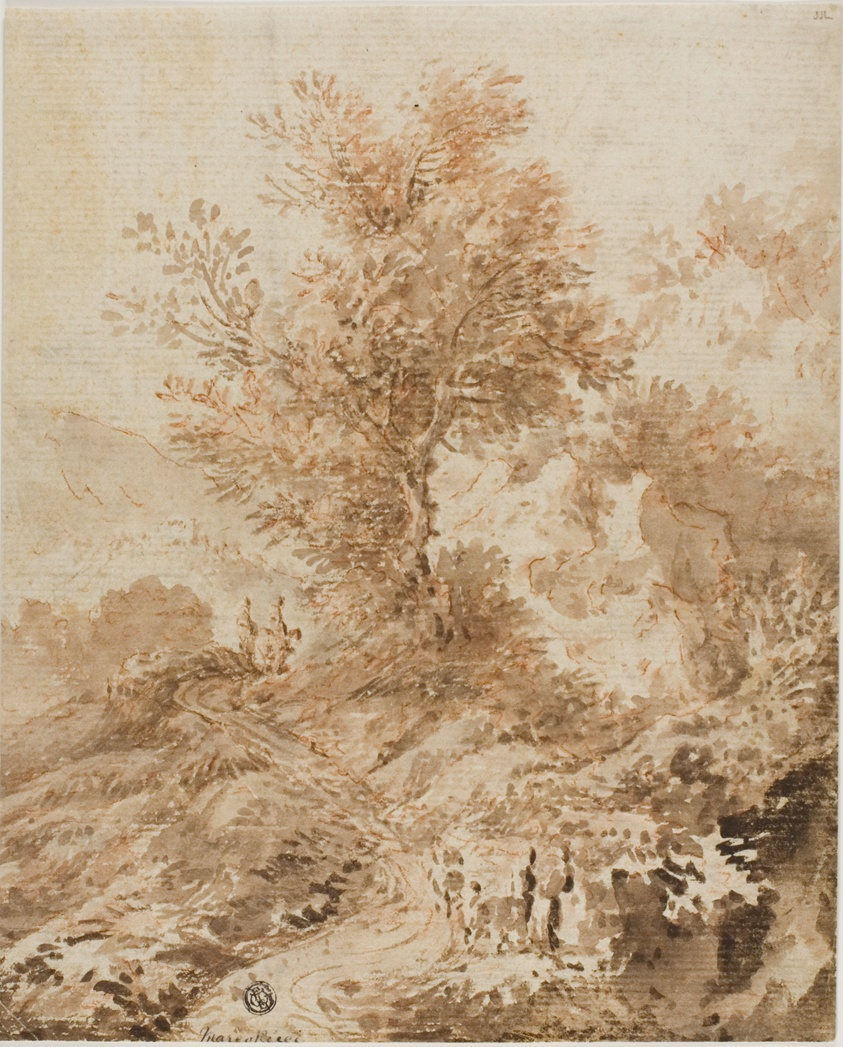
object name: Drawing and Watercolor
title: Travelers on a Winding Road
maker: Style of Alessio de Marchis (Italian, 1684-1752); or Marco Ricci (Italian, 1676-1729)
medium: Brush and brown wash, with red chalk, on cream laid paper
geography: Italy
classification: ink or chalk wash; drawings (visual works); prints and drawing